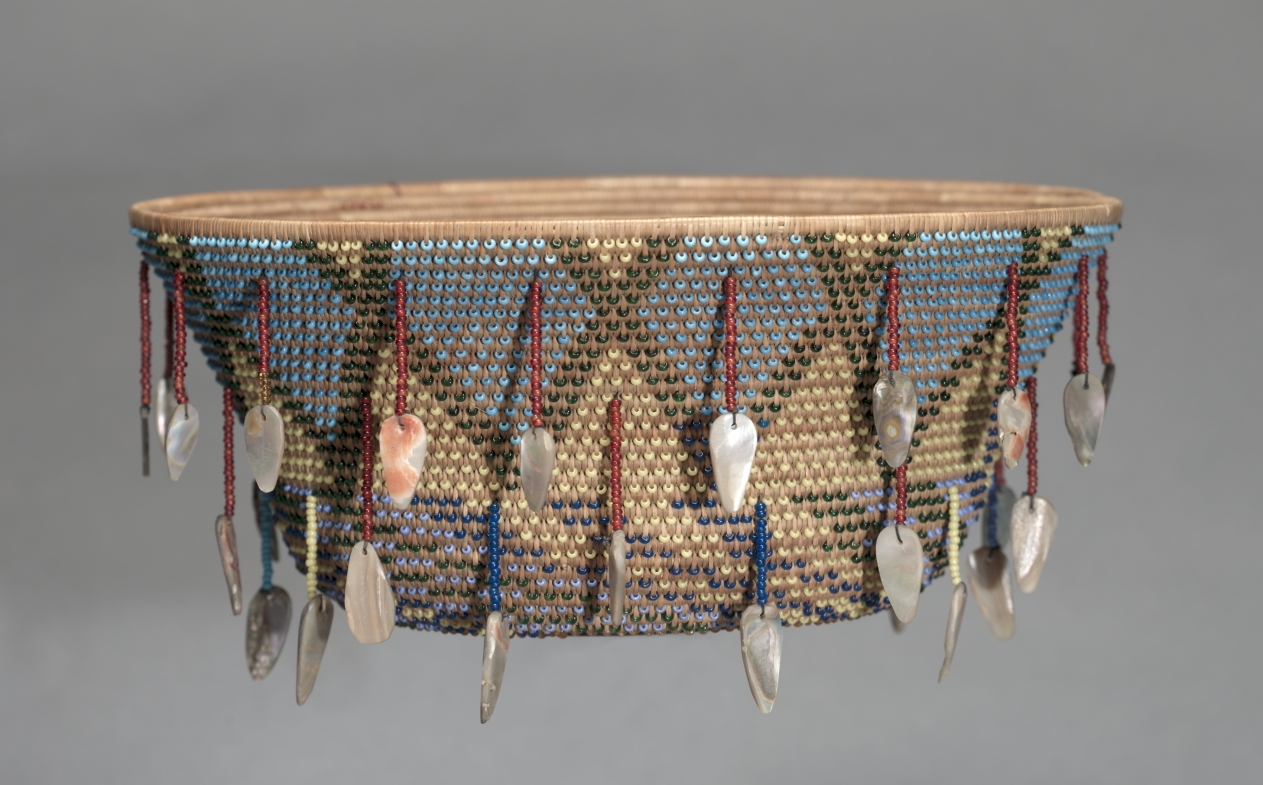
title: Gift Bowl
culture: California, Wintu, late 19th century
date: c 1890s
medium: coiled, beads, shells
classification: Basketry